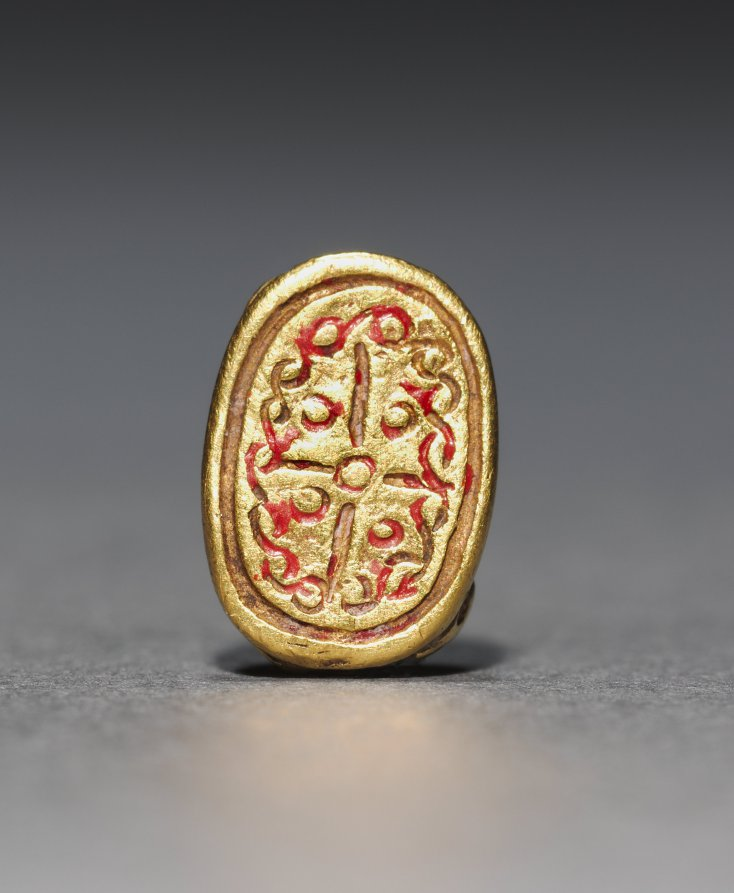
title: Scarab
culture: Egypt, Middle Kingdom (2040–1648 BCE), Dynasty 12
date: 1980–1801 BCE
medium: gold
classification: Scarabs